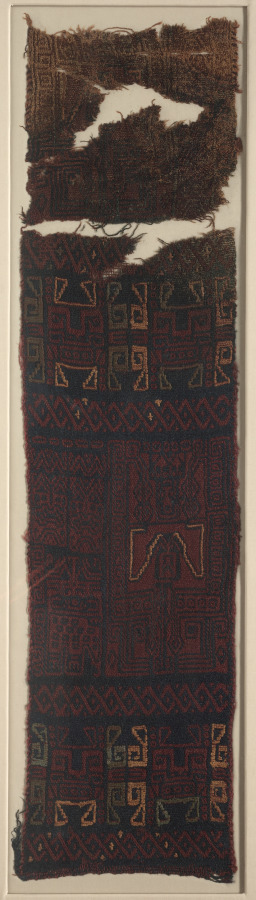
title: Textile Fragment with Frontal Deity Heads, Felines, and Interlace Pattern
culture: Peru, South Coast, Paracas, Yauca Valley(?)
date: 700–400 BCE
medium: camelid fiber; double-cloth with structural embroidery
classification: Textile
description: This textile fragment and (2005.13), belong to a group that represents Andean weavers’ earliest known achievements in double cloth, a technique that allows the creation of identical designs on both faces of the cloth but in reversed colors. They also record the devotion to abstraction typical of the Paracas style. One features three repeats of a highly geometrical standing deity with a fanged mouth. The other includes several stylized deity heads and a blocky, frontally posed feline. The type of garment that these fragments come from remains unknown.